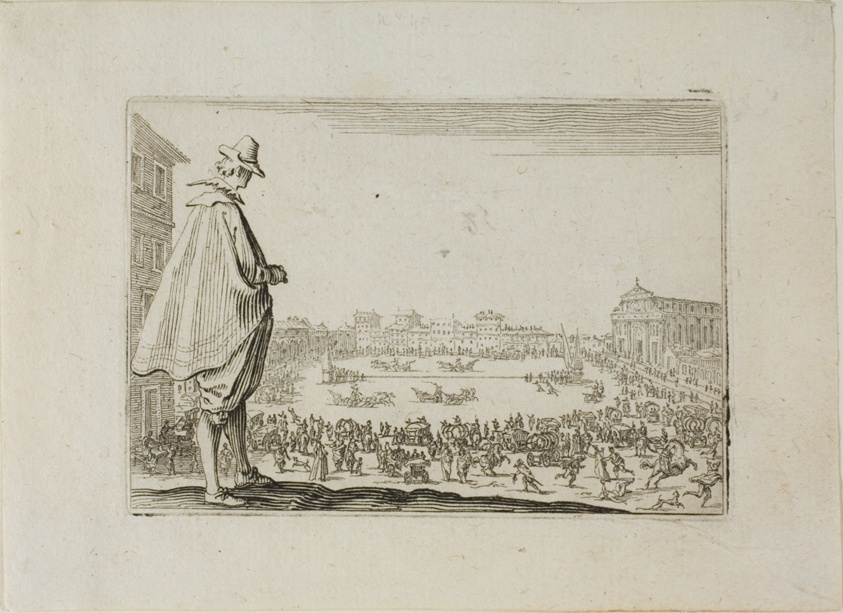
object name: Print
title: The Chariot Races at Santa Maria, from The Caprices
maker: Jacques Callot (French, 1592-1635)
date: c. 1622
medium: Etching on ivory laid paper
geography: France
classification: etching; print; prints and drawing